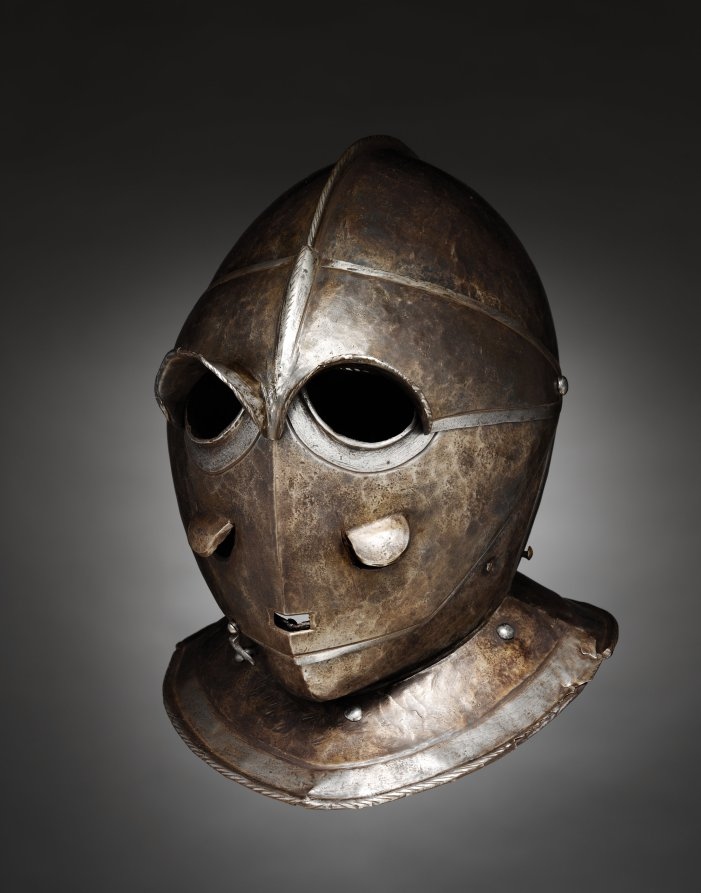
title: Savoyard Helmet (Todenkopf)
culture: Italy or Germany, early 17th century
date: c. 1600–20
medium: steel, blackened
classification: Arms and Armor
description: The term “Savoyard helmet” is used today to evoke the elite cavalry units formed by Charles Emanuel I, Duke of Savoy (1580-1630). Such helmets were designed principally to withstand and protect the wearer from shot from the powerful wheel-lock guns of the day, though their secondary function was to intimidate and terrify. The design of the helmet suggests a human face or skull. They were known as todenkopf or “death’s head” helmets in Germany. The helmet would have originally been associated with a three-quarter cuirassier armor. Similar armors are displayed nearby.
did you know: This type of helmet is also called a "todenkopf," translating to "death's head."